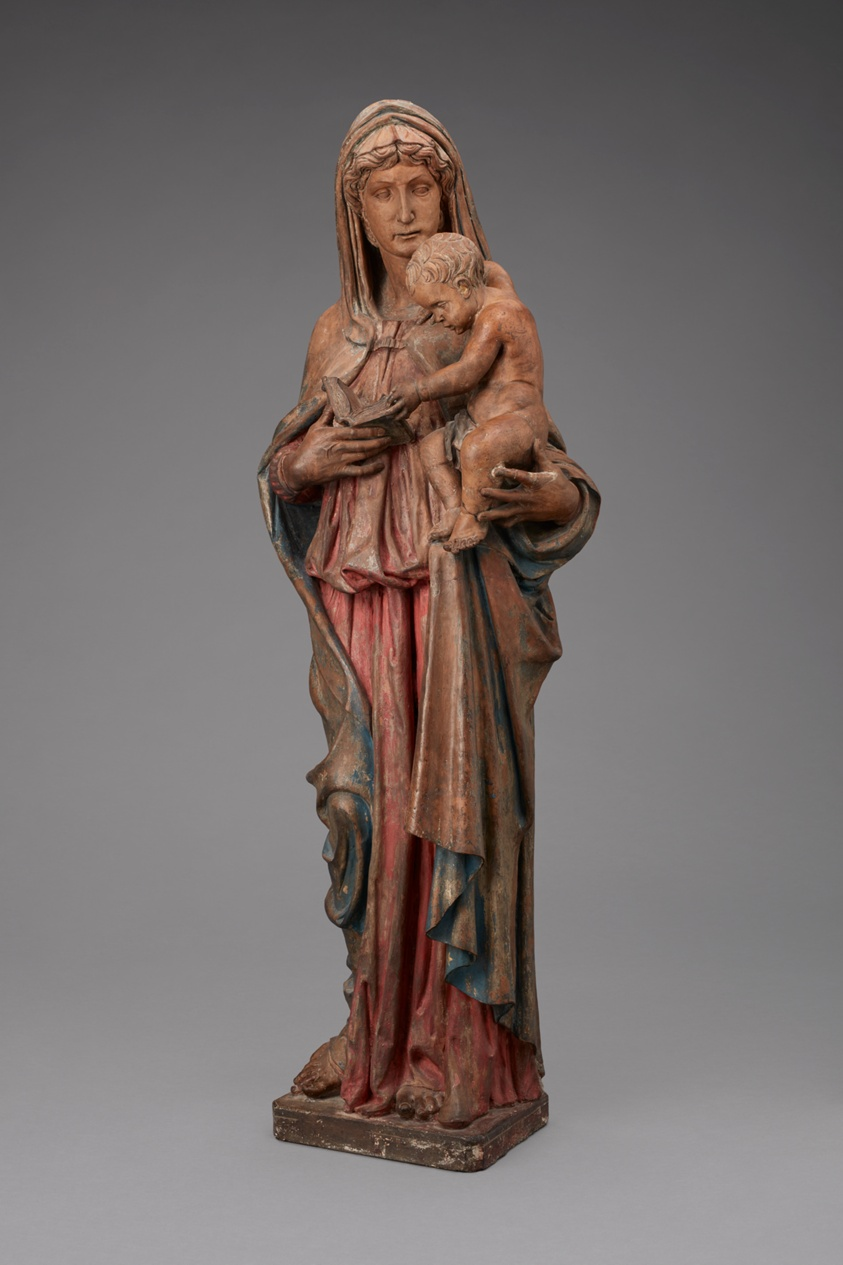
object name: Sculpture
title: Virgin and Child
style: sixteenth century, 16th Century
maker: Central Italian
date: c. 1500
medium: Pigmented terracotta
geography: Central Italy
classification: large scale; sculpture; Italian; terracotta (sculpture)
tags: Virgin and child/Madonna and child, Christianity, Christian subjects, religious figures, religious, religion, woman with children, woman, babies, child, mother and child, mother, Jesus, Virgin Mary